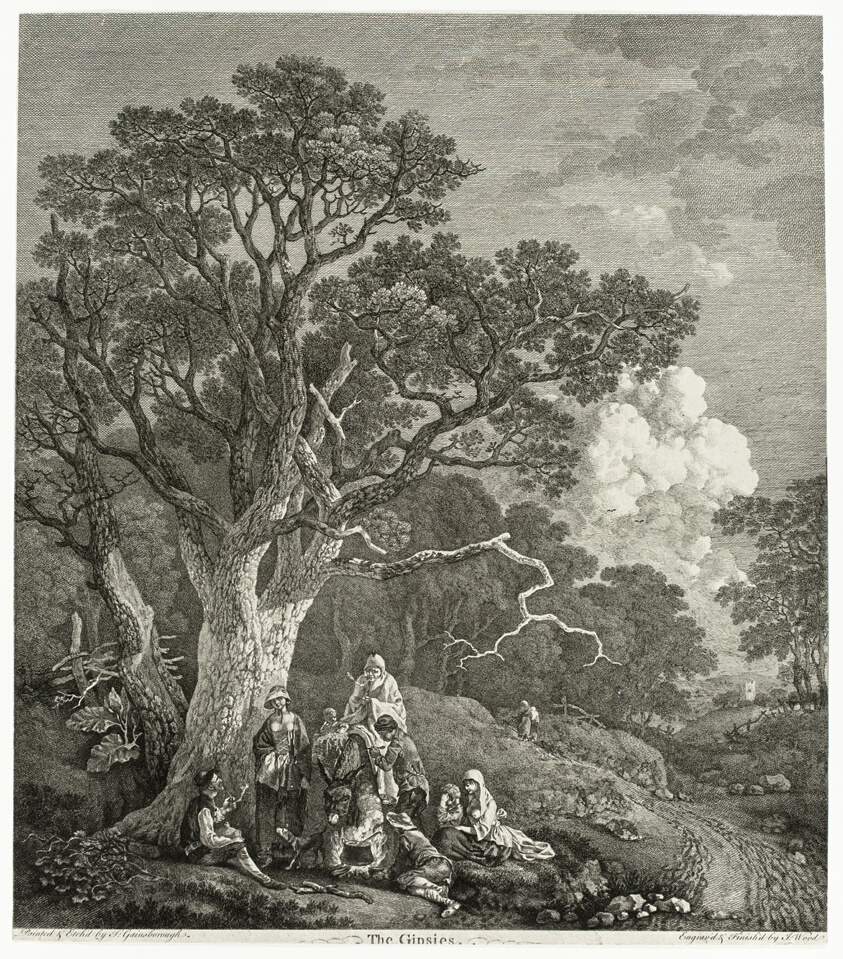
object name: Print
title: Wooded Landscape with Gypsies Gathered Round a Fire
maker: Thomas Gainsborough (English, 1727-1788)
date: 1753/54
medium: Etching on ivory wove paper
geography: England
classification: etching; print; prints and drawing